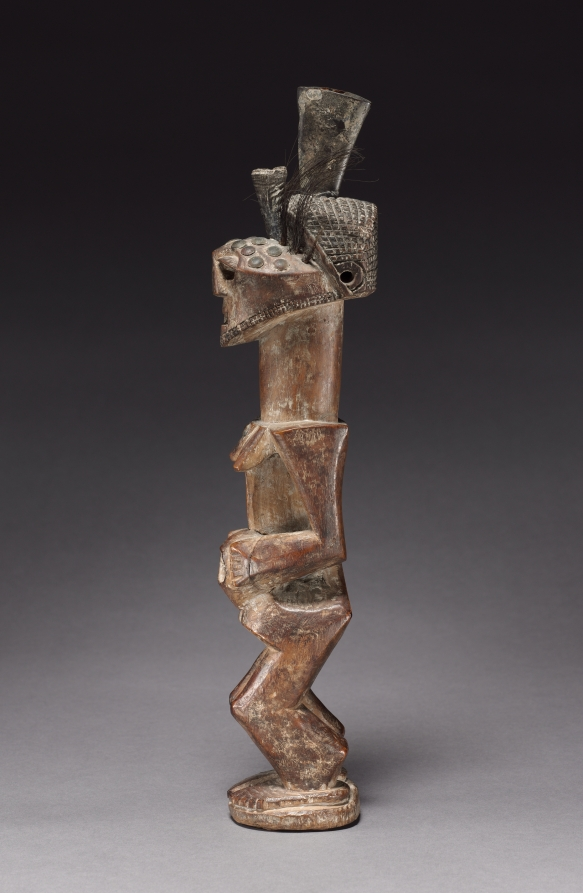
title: Female Figure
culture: Africa, Democratic Republic of the Congo, Songye people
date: late 1800s-early 1900s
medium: Wood, upholstery studs, antelope horns, and animal hair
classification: Sculpture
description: Mankishi figures were believed to have magical powers and were used by diviners to contact spirits in otherworldly realms. Smaller, personal power figures were used to connect with “common” ancestors, while the larger Mankishi figures contacted higher-ranking ancestral spirits. These power figures were kept in their own personal spaces because of their powerful status, and could only be handled by their designated nkunja, or guardian.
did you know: Because this Mankishi is neither small or quite large in size, it was most likely used by a family rather than an individual.